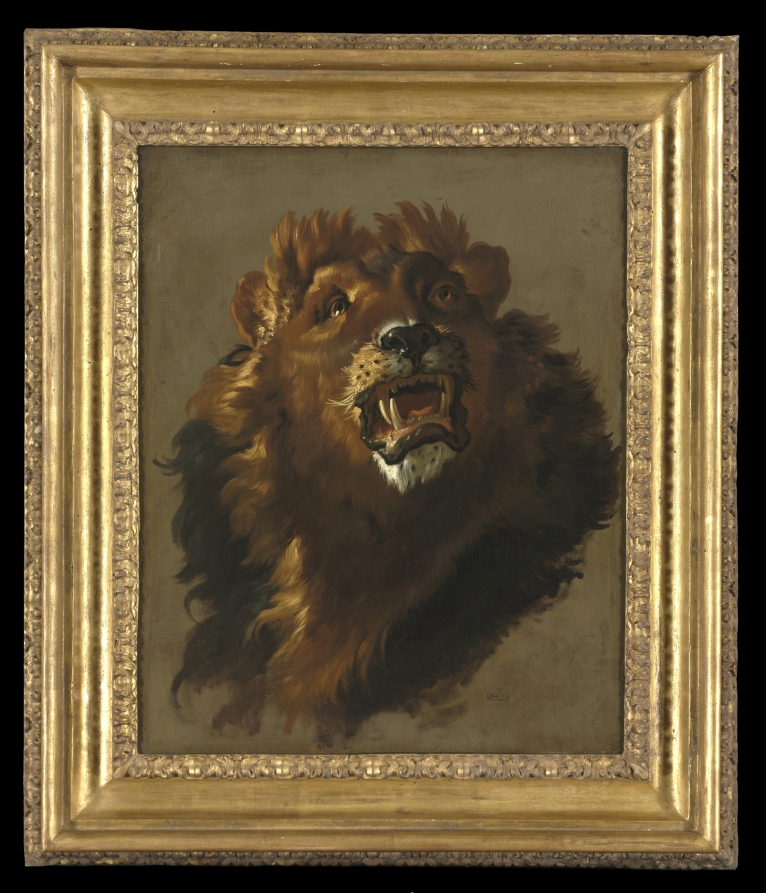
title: Lion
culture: France, 18th century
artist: Giuseppe Baldrighi (Italian, 1723–1803)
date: 1750s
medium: oil on canvas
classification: Painting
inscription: signed lower right: Oudry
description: Looking upward with eyes gleaming and mouth open, the lion conveys wild elegance. The sketch comprises short brushstrokes, and its most striking detail is the thick and plentiful mane. Undefined planes of black make up the lion's longest tresses, but closer to the face, the mane becomes increasingly light. Although the darkest parts of the mane lack precise definition, the chestnut shades of the mane host shadows and highlights that lend a sense of realism. Additionally, varied shades of brown are contrasted by the lighter, creamier shades of white at the lion's muzzle. The lifelike nature of this sketch is further communicated by the bright, wet patches on the lion's nose and mouth. Likewise, a bright glimmer in the lion's right eye illustrates its vitality. At the bottom right of the lion, a small signature attributes the painting to the French animal painter Jean-Baptiste Oudry, although this signature was a later addition. This is actually the work of the Italian painter Giuseppe Baldrighi, court artist to the Dukes of Parma. Sent to Paris in 1752, Baldrighi studied with a number of leading French painters, including Oudry, leading to a number of animal studies in Oudry's style. These works emulate the elder artist's smooth handling and stem directly from Oudry's method of executing head studies of animals in expressive poses. This work has a much blunter facture, a more linear use of paint, and a lack of psychological depth in the animal's expression—all characteristic of Baldrighi.